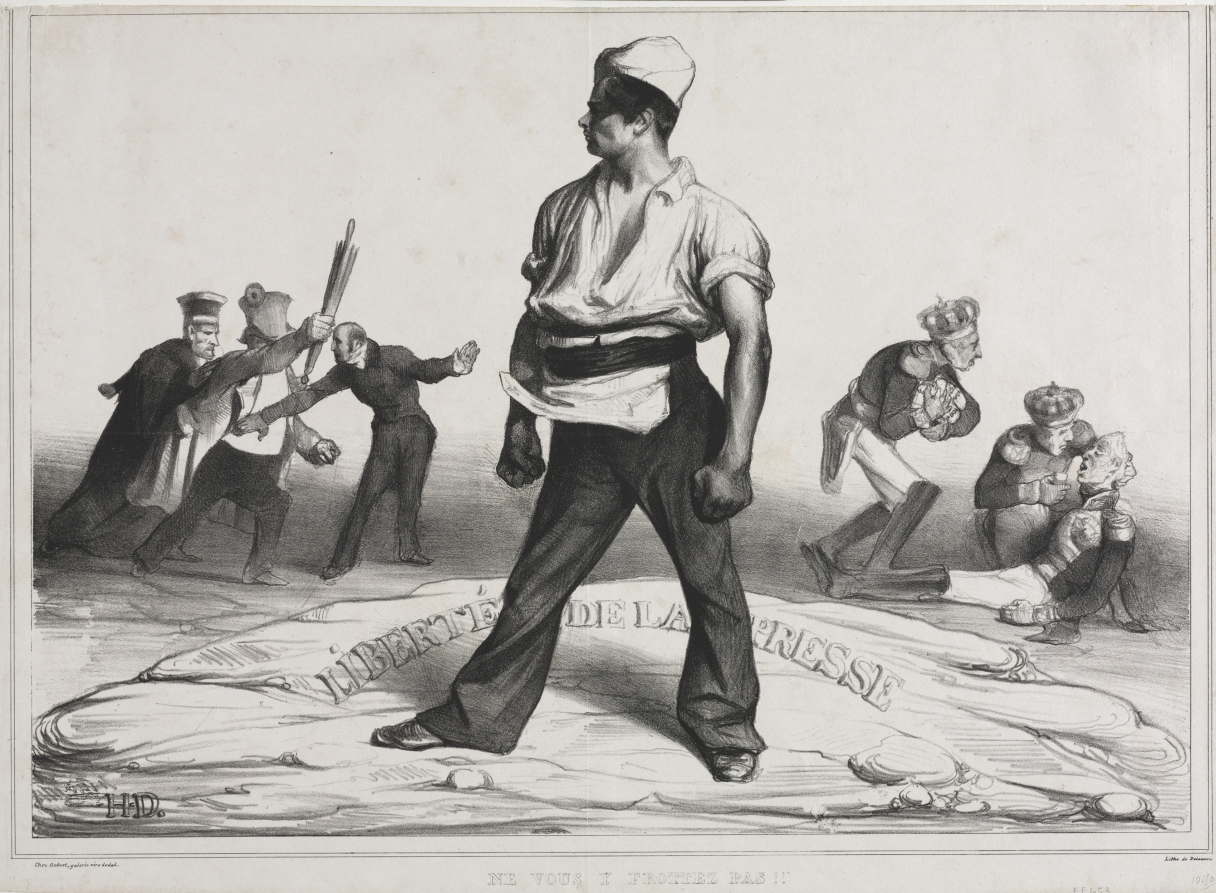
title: Don't Meddle With It!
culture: France, 19th century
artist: Honoré Daumier (French, 1808–1879)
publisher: Aubert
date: 1834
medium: lithograph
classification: Print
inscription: Lower margin, printed: Chez Aubert, galerie vero dodat. / Litho. de Delaunois ; Below image, printed: NE VOUS Y FROTTEZ PAS!! ; Lower margin, in pencil: EE653 / 10150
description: This print was published in March 1834 as plate 20 from The Monthly Association (l’Association Mensuelle), a special edition of La Caricature.